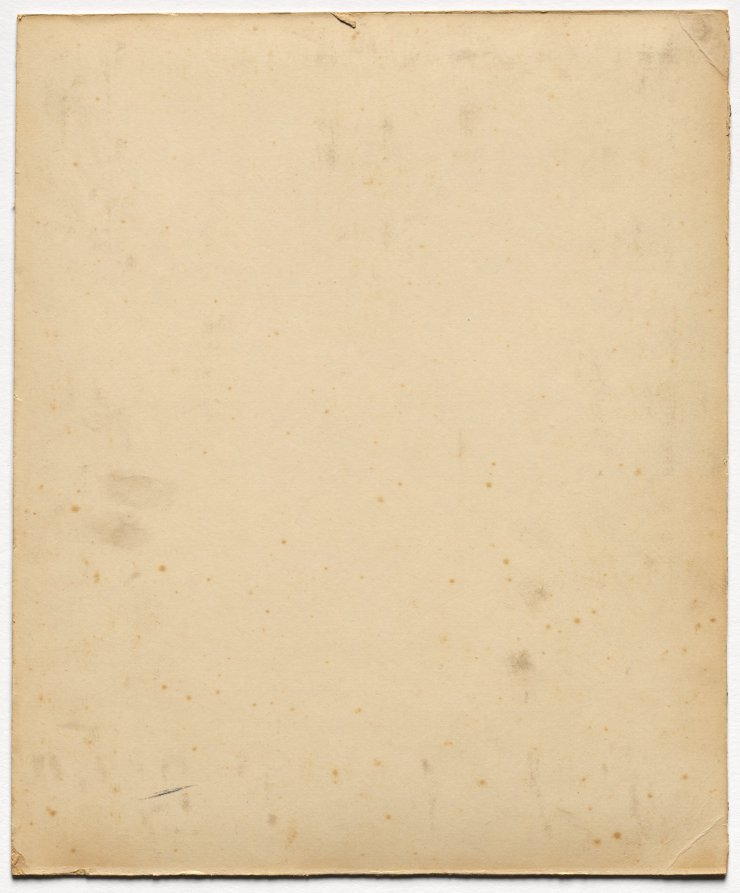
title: Portrait of Anne Hyde, Duchess of York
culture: England, 17th century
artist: Nicholas Dixon (British, c. 1708)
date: c. 1662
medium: watercolor on vellum in a large wooden frame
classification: Portrait Miniature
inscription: Label inside of back: Henry J. Murcott, London. Written in ink on backing: "Anny Hyde, first Wife of James II, Mother of Queen Mary II, Queen Anne. From Lord Currie's collection."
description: Though knowledge about his birth and training remain obscure, Nicholas Dixon is known to have been a favorite miniature painter of the English court at the close of the seventeenth century. He succeeded Samuel Cooper (1608/9–1672) as limner to King Charles II in 1673 and was Keeper of the King’s Picture Closet, for which he was granted an irregularly paid annuity of £200. Dixon painted a substantial number of ambitiously scaled miniatures—which became increasingly uncommon among practitioners of the art form when the more constrictive support of ivory supplanted vellum in the early 1700s. Dixon often signed his work with the monogram ND, and many of his large cabinet miniatures were copies of portraits, religious scenes, and mythological paintings by old masters, thirty of which formed part of the collection of the dukes of Portland. Among the characteristics of his style are ruddy flesh tones and drowsy eyes, and like the work of John Hoskins (c. 1590–1665), who may have been his teacher, Dixon favored softer modeling and diffuse lighting of his subjects, as opposed to the dramatic shadows employed by Cooper. Two lottery schemes—one in 1684/85 and the other in 1698— involving the exhibition of miniatures and the distribution of cash prizes proved disastrous for Dixon, who was in financial ruin by 1700 and constrained to sell a large number of works from the lottery. Anne Hyde (1637–1671), the sitter in this portrait, was around the age of twenty-four when the miniature was painted. She faces right and sits upon a dull red chair before a dressing table covered with a deep red embroidered cloth or tapestry that is fringed at the edges. A mirror and open jewel box lie on a table that is in front of a dark green curtain. The sitter has gray eyes and wears a golden brown satin décolleté dress with white ruffled undersleeves ornamented with jeweled closures. A necklace of large pearls hangs around her neck, and jeweled brooches fasten a winding rope of pearls to the bodice of her gown. Her right elbow rests on the table, and her fingertips comb through her long, wavy brown hair, which falls over her shoulders to below her waist. Her left arm extends toward her knee as she lightly holds a measure of her sash under her thumb while pointing downward with her index finger. The gracefully arranged, tapered fingers indicate Restoration court refinement.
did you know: This portrait is after a well-known and frequently copied oil painting by Peter Lely; it is nearly identical but with crimson and gold drapery in place of the dressing table and mirror.